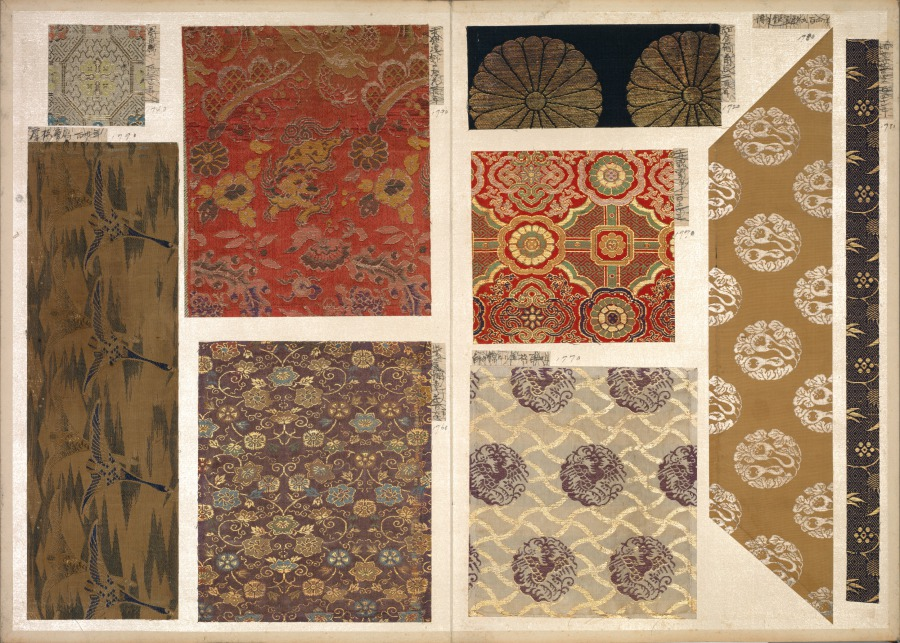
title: Album of Textile Samples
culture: Japan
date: 1790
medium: silk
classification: Textile